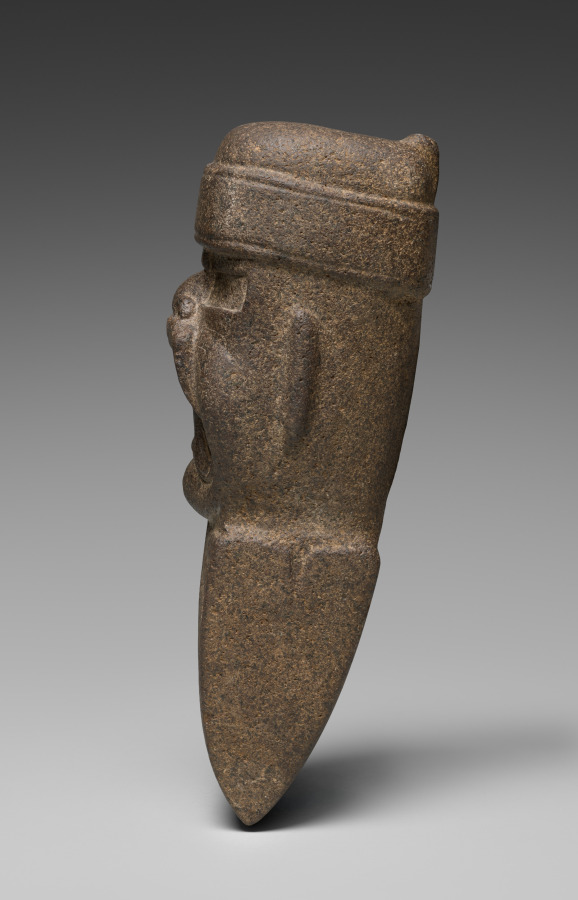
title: Celt with Deity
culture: Mesoamerica, Mexico, Olmec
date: 1000–300 BCE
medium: stone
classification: Sculpture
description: This ceremonial object has the head of a deity and a body shaped like an axe blade (celt) used to clear land for agriculture. The flared mouth, toothless gums, and fangs are typical of Olmec supernatural beings. The meaning of the body's "four-dots-and-a-bar" motif is unclear, but it sometimes appears in depictions of plants. The deity, then, seems to be associated with fertility.